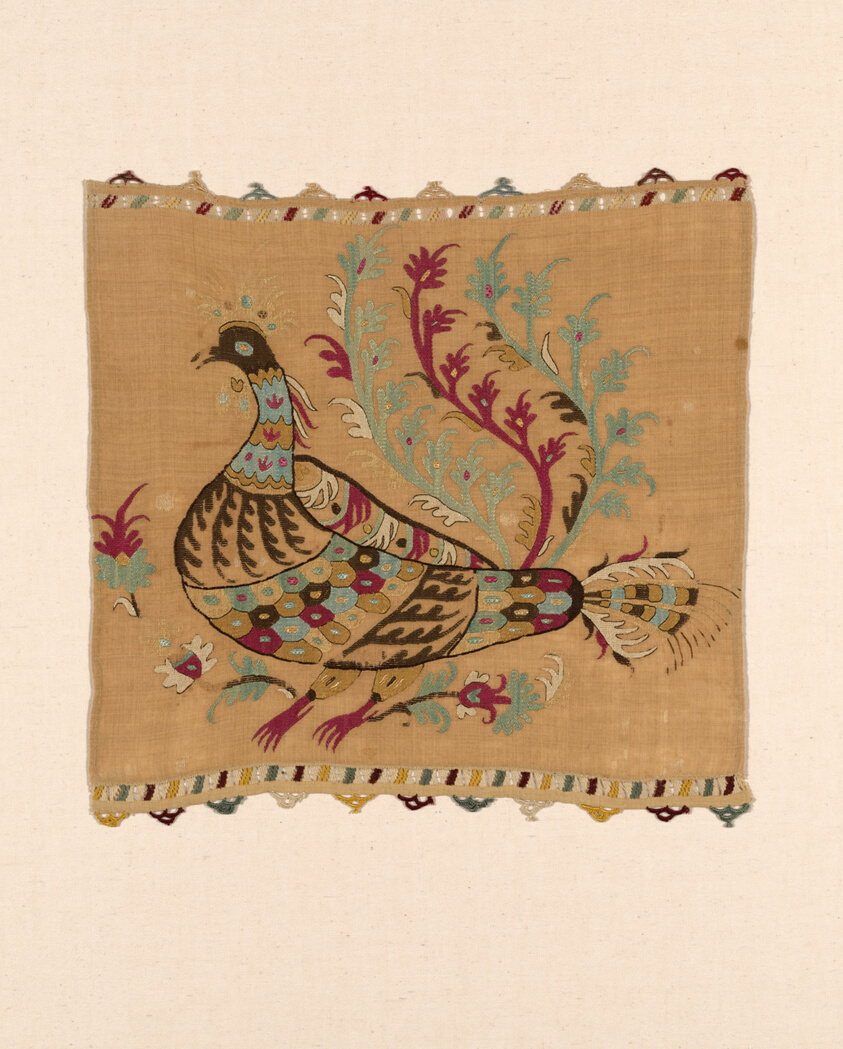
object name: Textile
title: Pillow Cover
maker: Greece, Northern Sporades Islands, Skíros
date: 17th century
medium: Linen, plain weave; embroidered with silk in double running, running (pattern darning), and satin stitches; bordered with cut and drawn work embroidered in daring stitches; overcast bars and button hole stitch points and bullion picots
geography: Sporádhes department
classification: textile; needlework (visual works)